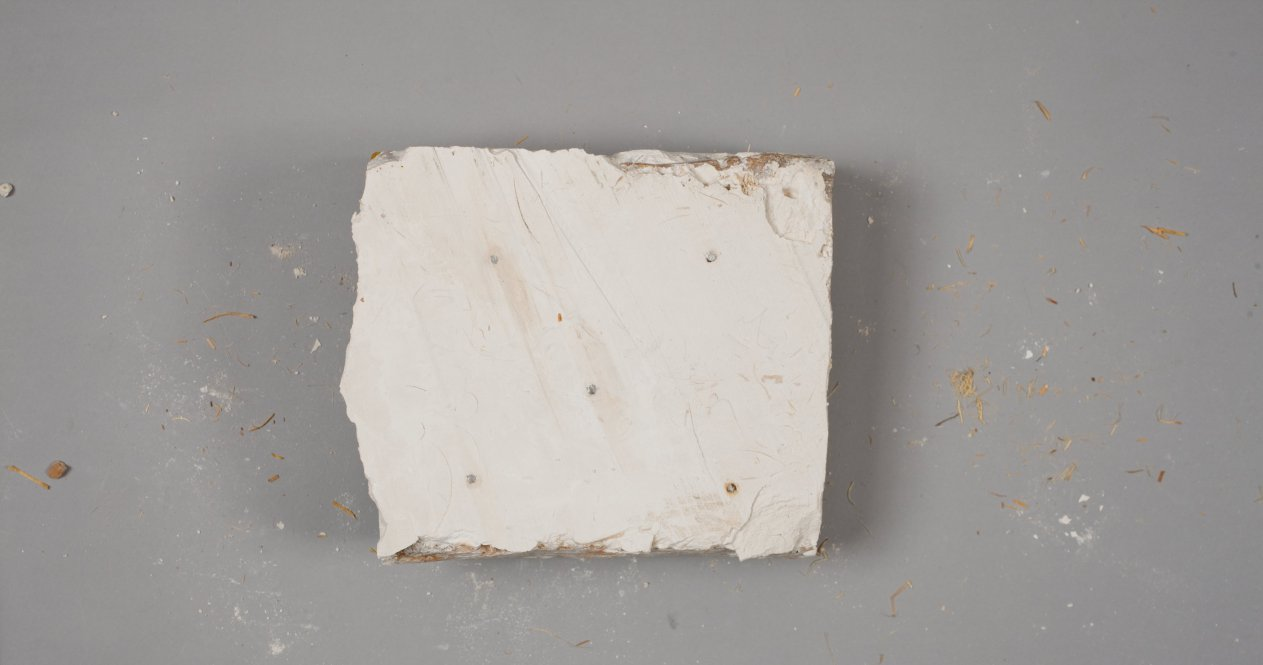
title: Fragment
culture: Italy, Florence, 16th century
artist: Benedetto Buglioni (Italian, 1461–1521)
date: c. 1900–1910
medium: glazed terracotta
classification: Sculpture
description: The Madonna sits upon a throne with the Christ Child standing on her knee. He is steadied by his mother, turning delicately to grasp the Virgin's robe for support. On the left is St. Francis, identified by his stigmata. On the right, St. Anthony Abbot is identified by his monk's robe and T-shaped walking stick. The brown robes of the saints, the purple of the Virgin's tunic (a shade characteristic of the artist), and the flesh tones of the figures contrast strongly against the bright blue background. In the semicircular sky behind the figures, three winged cherub heads emerge, representing a host of angels. The inclusion of St. Francis in this altarpiece honors the saint, suggesting that the altarpiece may have been originally built into the wall of a Franciscan institution in Tuscany. Two shields bearing the Borgherini family crest appear in the lower portion of the altarpiece's border, further suggesting that the chapel for which this altarpiece was made was likely owned or endowed by the family. Glazed terracotta is both durable and decorative and the gleaming white of this piece would have stood out in the darkness of a church. The medium was made popular by Renaissance artist Luca della Robbia and came into fashion as a substitute for expensive carved marble. A rounded arch frame embellished with fruit and flower garlands as well as egg-and-dart and cord moldings accompanied the work when it was acquired, but was later determined not to be original and removed. Buglioni's work bears the influence of the della Robbias, particularly in the simple color scheme. Buglioni likely worked in the studio of Luca's nephew, Andrea, where he would have learned the technique of glazing terracotta.